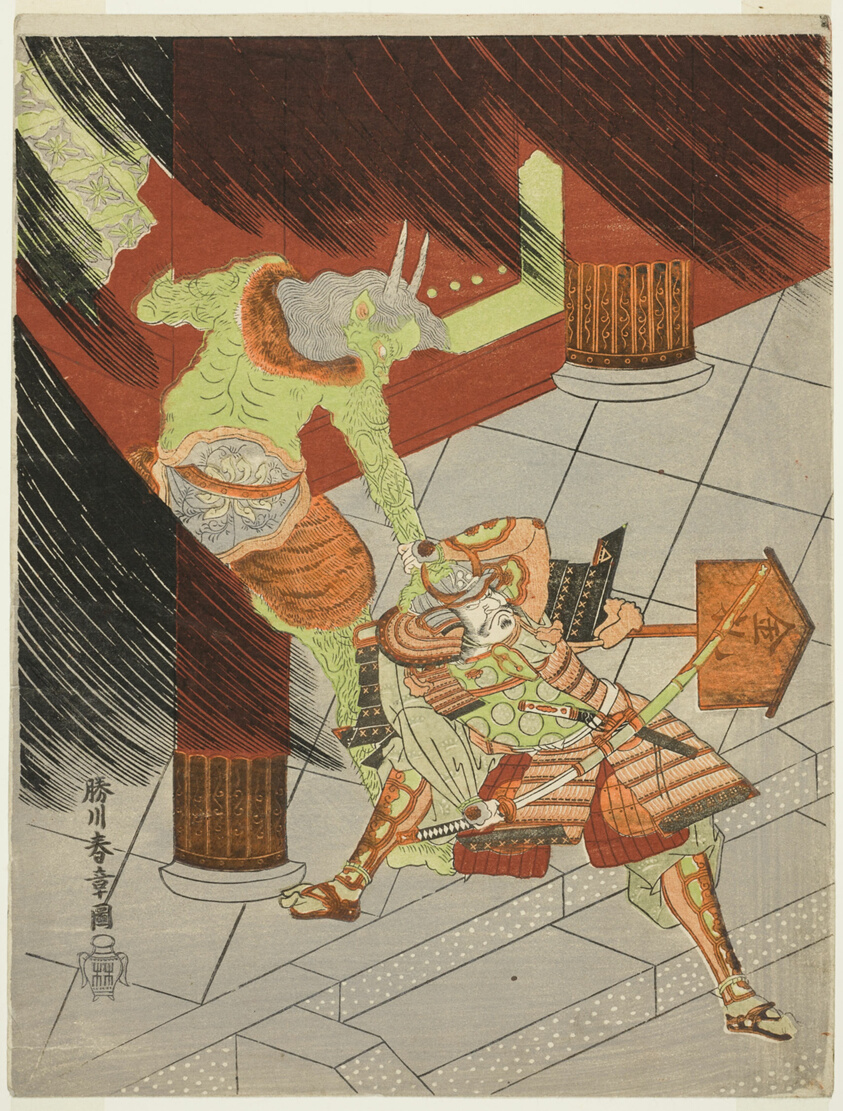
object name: Print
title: The Warrior Watanabe no Tsuna Fighting the Demon at Rashomon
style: Japanese (culture or style)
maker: Katsukawa Shunshô 勝川 春章; Japanese, 1726-1792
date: About 1770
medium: Color woodblock print; chûban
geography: Japan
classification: woodblock print; print; asian art